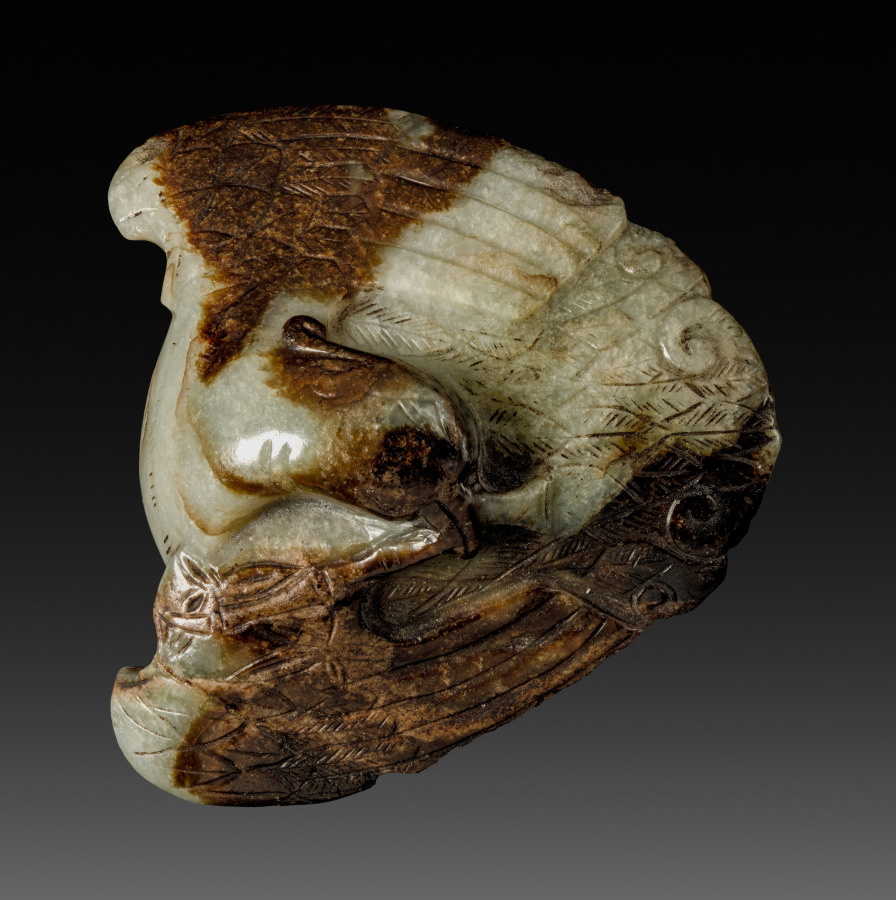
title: Pendant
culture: China, Song dynasty (960-1279) or later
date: 960–1279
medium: jade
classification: Jade